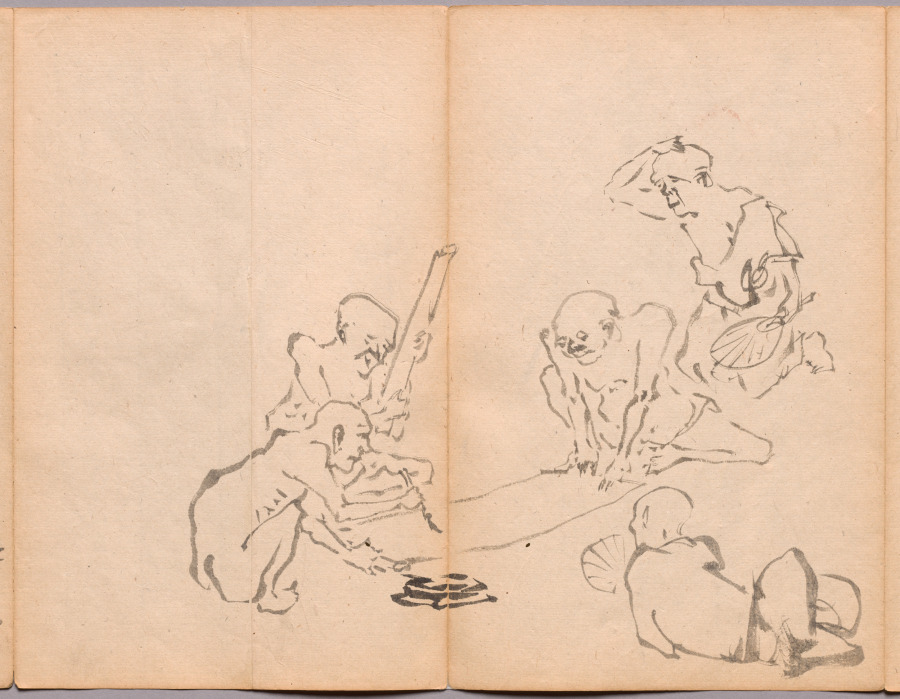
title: Calligraphy in the Heat from Sketch Album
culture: Japan, Edo period (1615–1868) to Meiji period (1868–1912)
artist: Kawanabe Kyōsai (Japanese, 1831–1889)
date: mid- to late 1800s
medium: Accordion-style book of 26 double-leaves; ink and color on paper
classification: Bound Volume